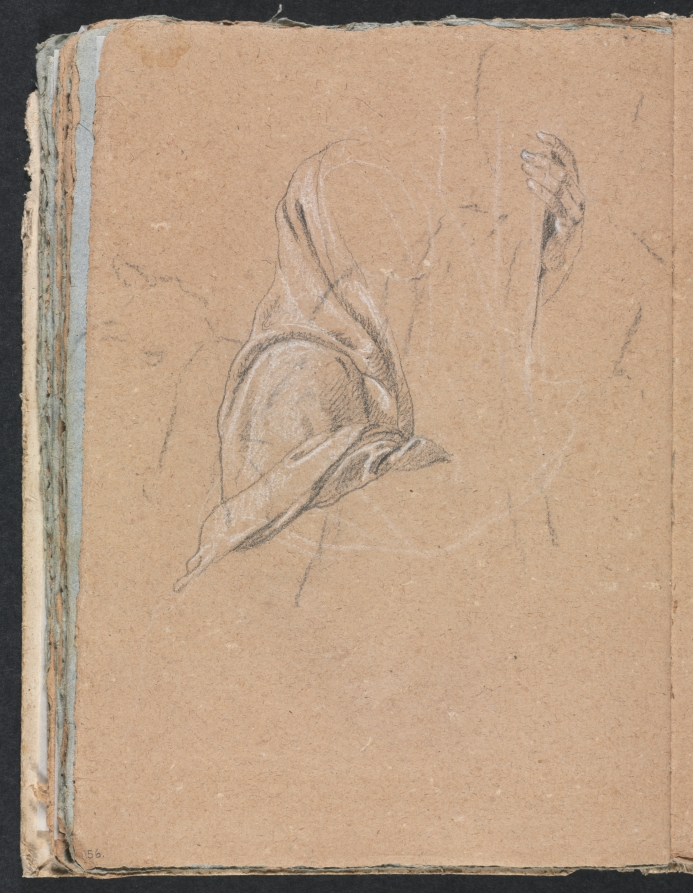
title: Verona Sketchbook: Drapery study with left hand (page 56)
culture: Italy, 18th century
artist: Francesco Lorenzi (Italian, 1723–1787)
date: 1760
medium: black chalk with white heightening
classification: Bound Volume